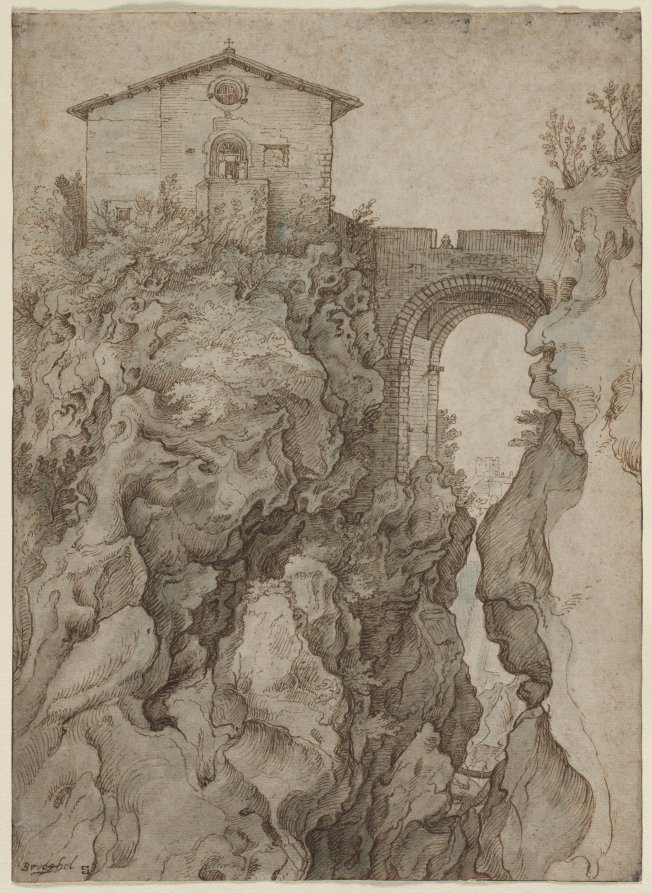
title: Ponte San Rocco at Tivoli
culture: Flanders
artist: attributed to Guilliam van Nieulandt (Dutch, 1584–ca. 1635)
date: 1600–1636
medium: pen and brown ink and brush and blue and brown wash over traces of black chalk; framing lines in brown ink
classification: Drawing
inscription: falsely signed, lower left, in brown ink: Brueghel ; VERSO, upper left, in graphite: 100 [sideways] ; lower left, in graphite: 13 [circled] ; lower center, in graphite: Pieter Brueghel d. Ä ; lower right, in graphite: [O + C 25?] [diagonally] ; lower right, in graphite: 15/15 [erased] ; lower right, in graphite: [illegible] 2000.-